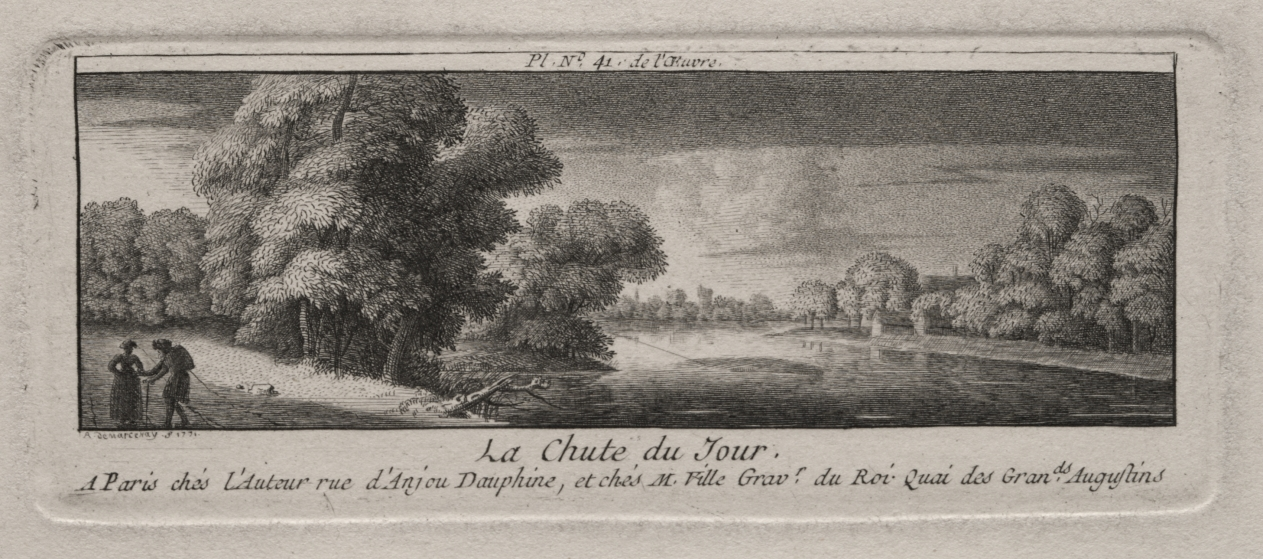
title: The Close of the Day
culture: France, 18th century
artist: Antoine de Marcenay de Ghuy (French, 1724–1811)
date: c. 1771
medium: etching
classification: Print